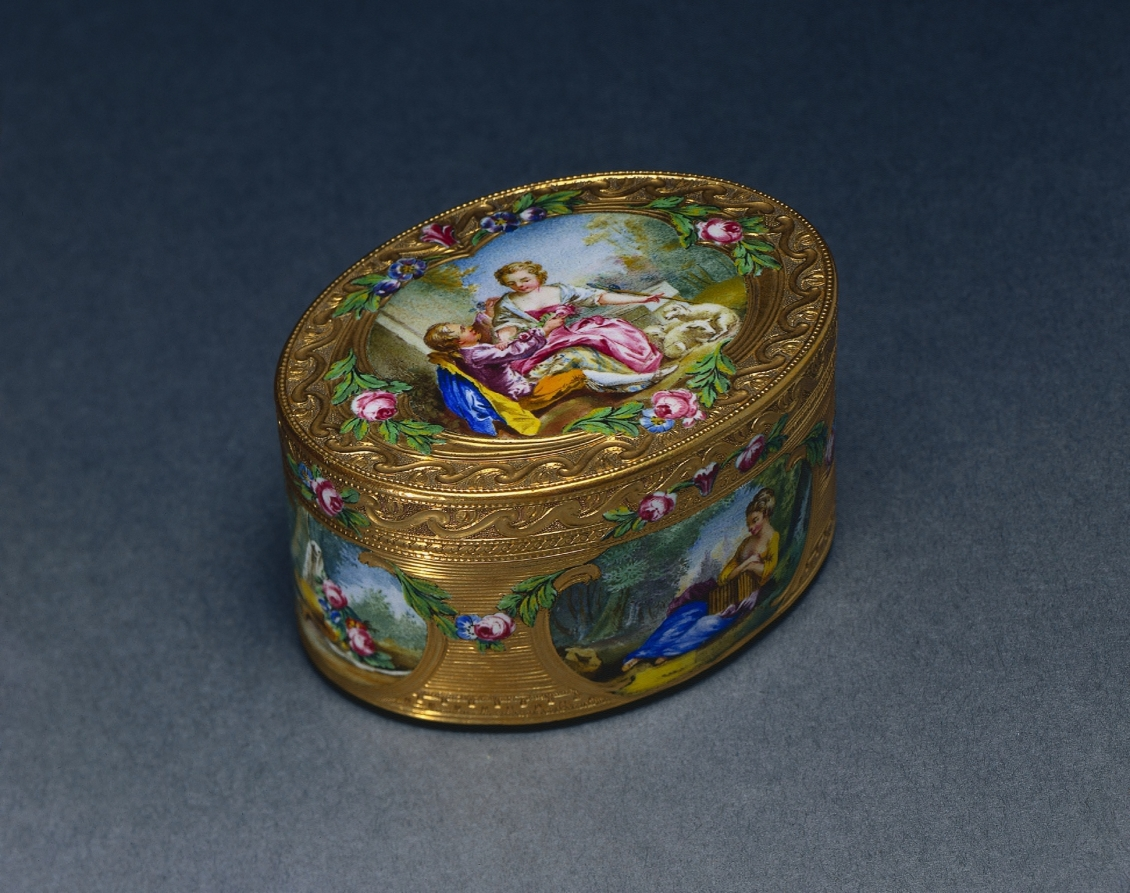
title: Snuff Box (Tabatière)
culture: France, 18th century (style of Louis XV)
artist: Francois Guillaume Tiron (French)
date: 1761–62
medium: gold and enamel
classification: Miscellaneous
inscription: [Maker's mark of Francois-Guillaume Tiron, master goldsmith in 1747, inside cover]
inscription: [Warden's mark, Paris, 1761-1762, inside cover]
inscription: [Charge mark of Eloi Brichard and Etienne Somfoye, Paris, 1756-1762, inside cover]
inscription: [Maker's mark of Francois-Guillaume Tiron, inside bottom]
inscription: [Warden's mark, 1761-1762, inside bottom]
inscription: [Charge mark of Brichard and Somfoye, inside bottom]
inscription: [Maker's mark of FG Tiron, left wall]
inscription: [Charge mark of Brichard and Somfoye, left wall]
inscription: [Warden's mark, Paris, 1761-1762, left wall]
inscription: [Discharge mark of J.J. Prevost, Paris, 1762-1768, bezel at right]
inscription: [Engraved number, maybe retailer's number]: "n. 13676"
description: The pastoral scenes that decorate this box are typical of the style of François Boucher, a celebrated painter of the period whose works were popularly reproduced on decorative arts. Snuff boxes, used practically as containers for powdered tobacco, were often decorated with miniature reproductions of notable works. The miniature on the cover is inspired by Boucher’s The Galant Pastor (Le Pasteur Gallant) (1738) and that on the bottom by The Amusement of the Shepherd Girl (L’Amusement de la Bergère) (1700s).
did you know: François Boucher was a favorite of the French royal court of Louis XV and named first painter of the king in 1765.